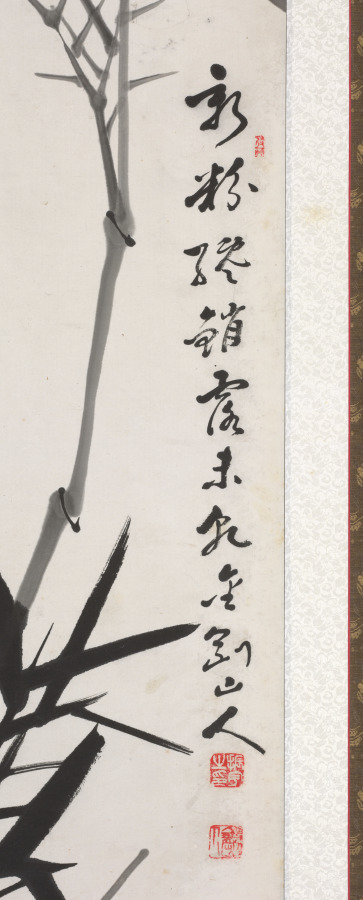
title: Bamboos in Wind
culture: Korea, Japanese colonial period (1910−1945)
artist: Kim Jin-woo (Korean, 1883–1950)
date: 1934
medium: Ten-panel folding screen; ink on paper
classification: Painting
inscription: Two chops stamped on each panel: 振宇之印 (Jinwoo’s Seal); 金剛山人 (Diamond Mountain Man)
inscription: Inscription written on the far-left panel: 甲戌流??寫於竹林堂金剛山人振宇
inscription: Inscription written on the 8th panel: 五百間淸風金剛山人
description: Active during the Japanese colonial period in Korea (1910–45), the artist Jin-woo Kim earned his artistic reputation for his expressive renditions of bamboo swaying in a strong wind. His piercing bamboo shoots are often compared to an iron spear, and their sharp leaves to a knife. It is believed that he deliberately emphasized sharpness in his brushstrokes to express his strong resistance against Japanese colonial oppression.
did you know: The artist’s prolific artistic production were a major part of fundraising efforts to support resistance activities for Korea’s independence.